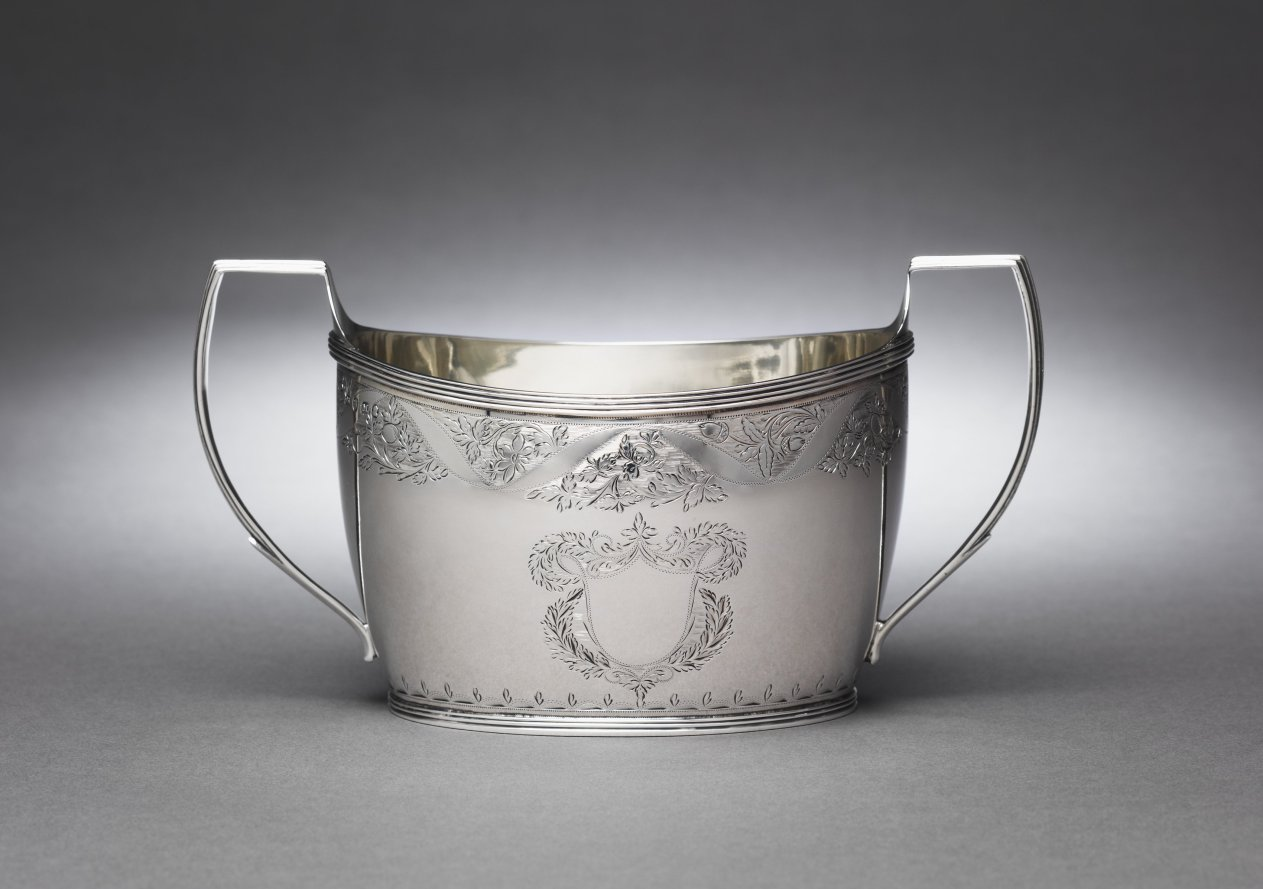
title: Tea Service (Sugar Bowl)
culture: London, England, 19th century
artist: Anne Bateman (British, 1748–1813)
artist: Peter Bateman (British, 1740–1825)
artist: William (I) Bateman (British, 1774–1850)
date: 1807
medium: silver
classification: Silver